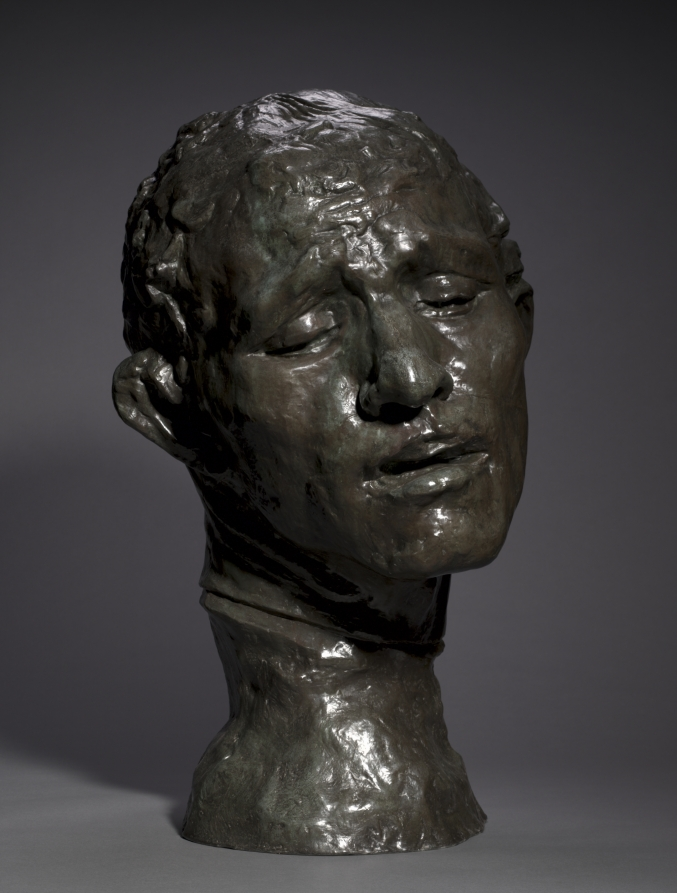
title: Heroic Head of Pierre de Wissant, One of the Burghers of Calais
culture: France, 19th century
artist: Auguste Rodin (French, 1840–1917)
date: 1886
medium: bronze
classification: Sculpture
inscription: inscribed at neck, left: A.Rodin; inscribed lower back: Alexis Rudier/Fondeur-Paris.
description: This sculpture depicts one of the figures in Rodin’s large public monument The Burghers of Calais (1884–89), featuring six French men who volunteered to be taken prisoner by the English in exchange for lifting the siege of Calais during the Hundred Years War (1337–1453). Pierre de Wissant’s anguished expression suggests extreme mental suffering as he contemplates his expected execution. Rodin exhibited a life-size version of the figure as an independent work before completing the monument. He later made multiple versions in various sizes and media.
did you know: This sculpture depicts the head of a figure from Rodin's large public monument The Burghers of Calais (1884-89). The CMA also owns a plaster version of the head.